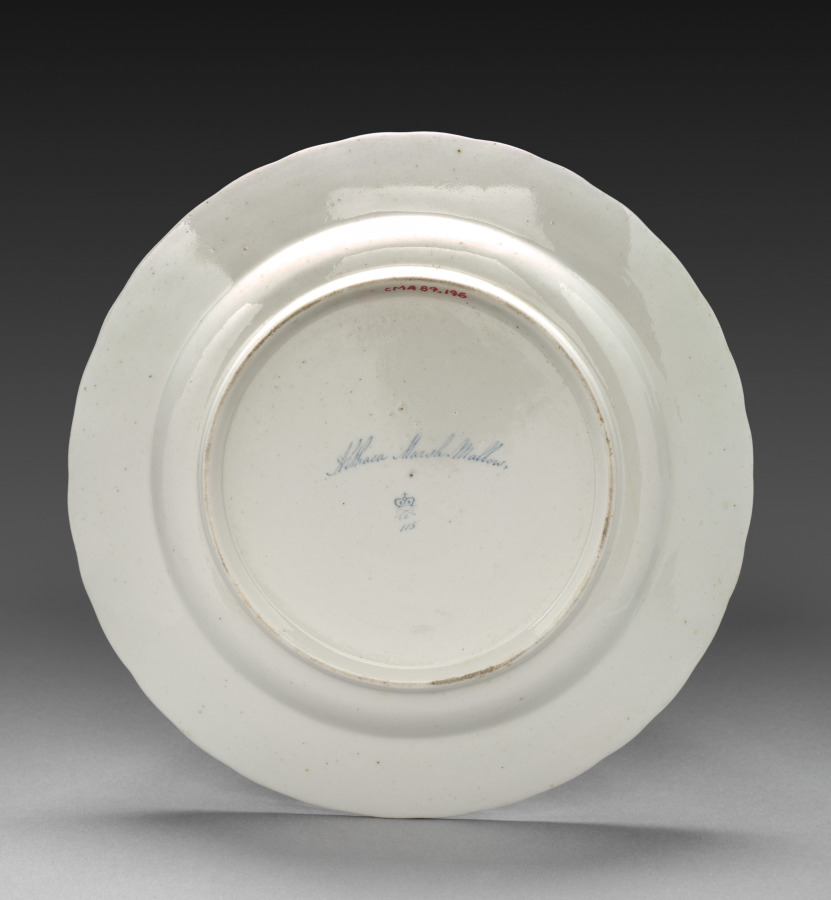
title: Plate from Dessert Service: Marsh Mallow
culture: England, Derby, 18th century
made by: Derby (Crown Derby Period) (British)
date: c. 1800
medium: porcelain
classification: Ceramic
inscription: inscribed in blue on back: [Althaea?] Marsh Mallow./crown/crossed batons and dots/D/115.